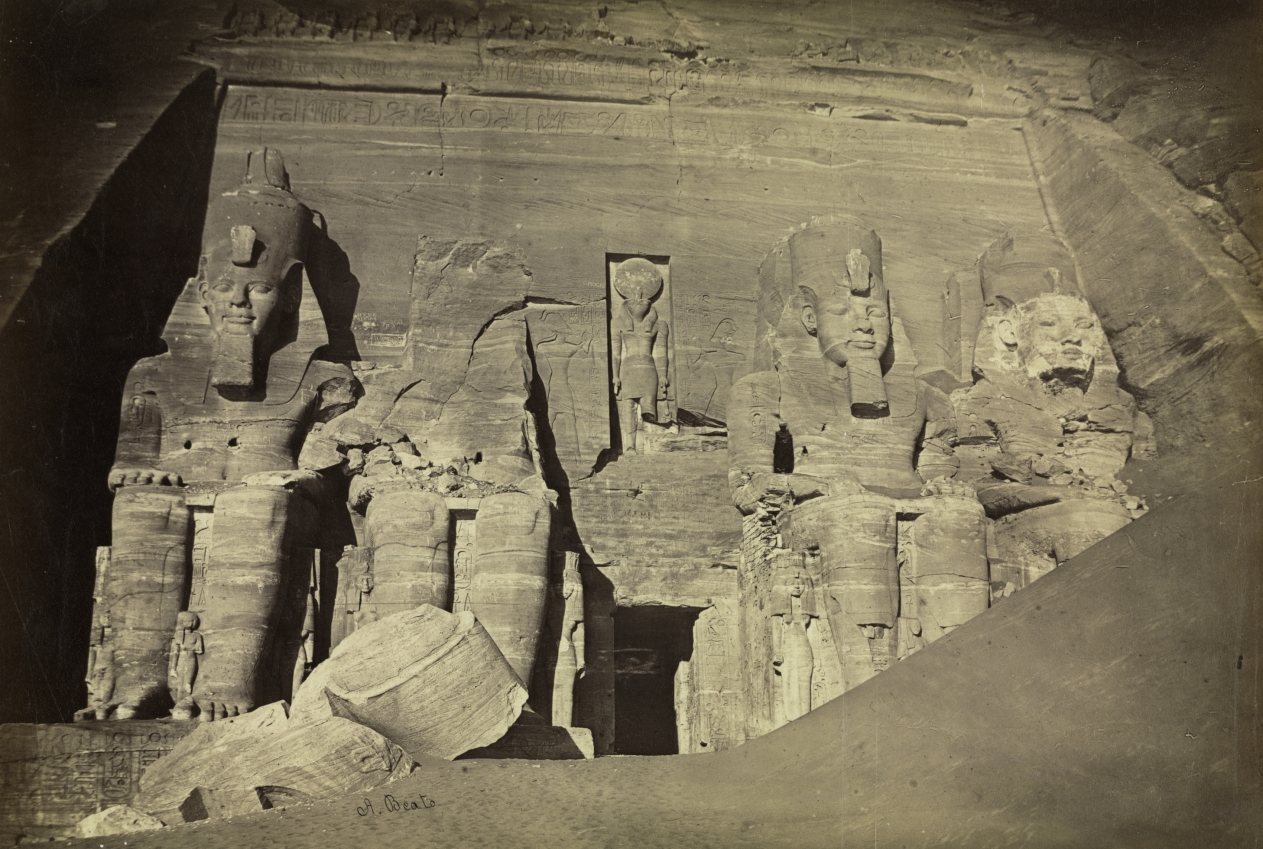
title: Temple of Ramesses II, Abu Simbel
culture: England, 19th century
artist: Antonio Beato (British, c. 1825–1903)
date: c. 1860s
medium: albumen print from wet collodion negative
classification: Photograph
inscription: Written in negative: "A Beato [signed]"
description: Throughout the 1800s and into the 1900s, prints, paintings, and photographs, like Louis Haghe’s Egypt and Nubia series, brought back by artists who voyaged to Egypt, inspired American and European artists, architects, and designers to emulate ancient Egyptian motifs and styles. Egyptomania blossomed through the 1800s and can be seen in architecture around cities like Washington, DC, and in the interiors of aristocratic homes, as well as in funerary monuments, such as in Lake View Cemetery in Cleveland, Ohio. Looking back at these creations provides an interesting historical groundwork for debating who has the right to interpret Egyptian motifs and styles.